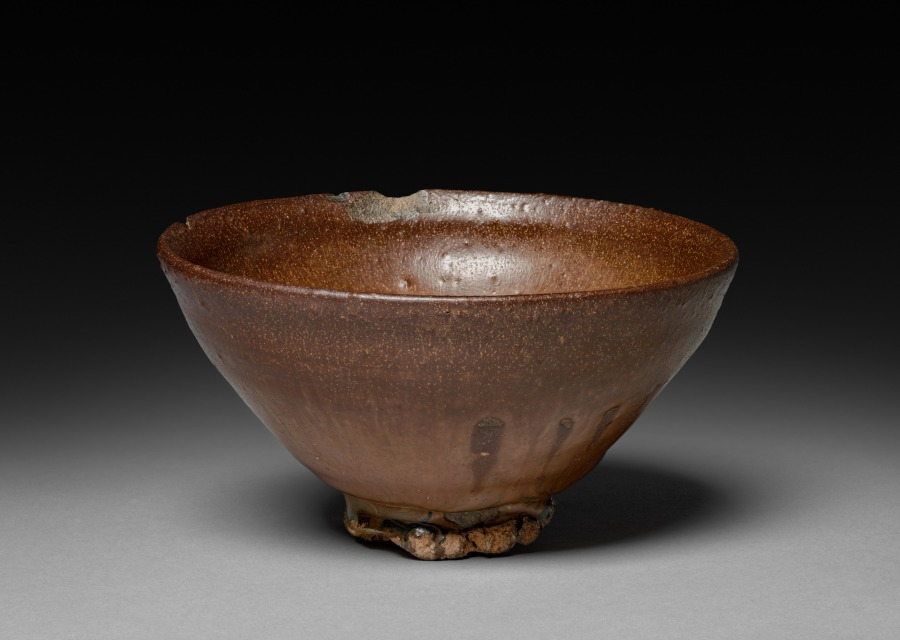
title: Tea Bowl: Jian ware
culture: China, near Shui ch'i, Song dynasty (960-1279)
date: 960–1279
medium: stoneware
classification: Ceramic